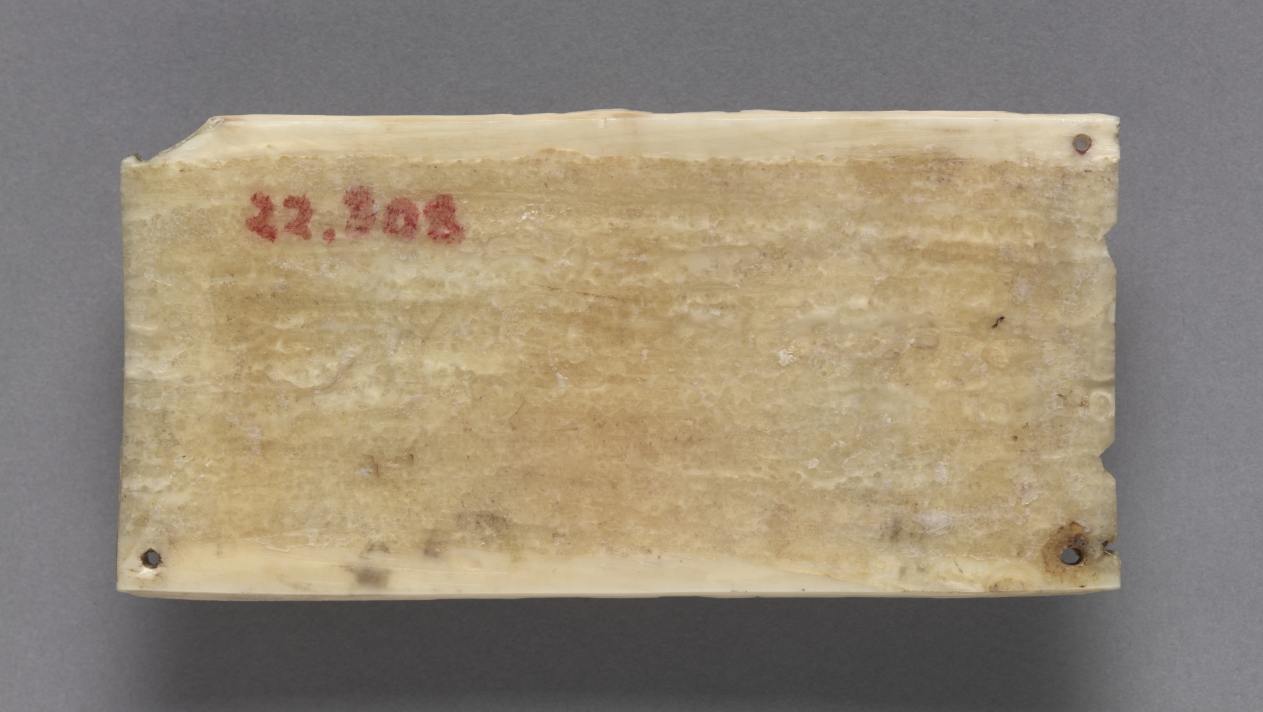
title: Plaque from a Portable Altar Showing Christ and the Apostles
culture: Germany, Lower Rhine Valley, Romanesque period, 11th century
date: 1050–1100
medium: walrus ivory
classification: Ivory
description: This intricately carved ivory panel once decorated the side of a portable altar. One of three plaques, it depicts Christ in Majesty and his apostles and were the first major acquisition of William M. Milliken, the museum's first curator of decorative arts and later director (1930–1958). As Milliken later recalled, the pieces "were immensely intriguing, monumental in scale, even if tiny in size, the Christ in the mandorla could have been enlarged and would have graced the tympanum of a great cathedral."